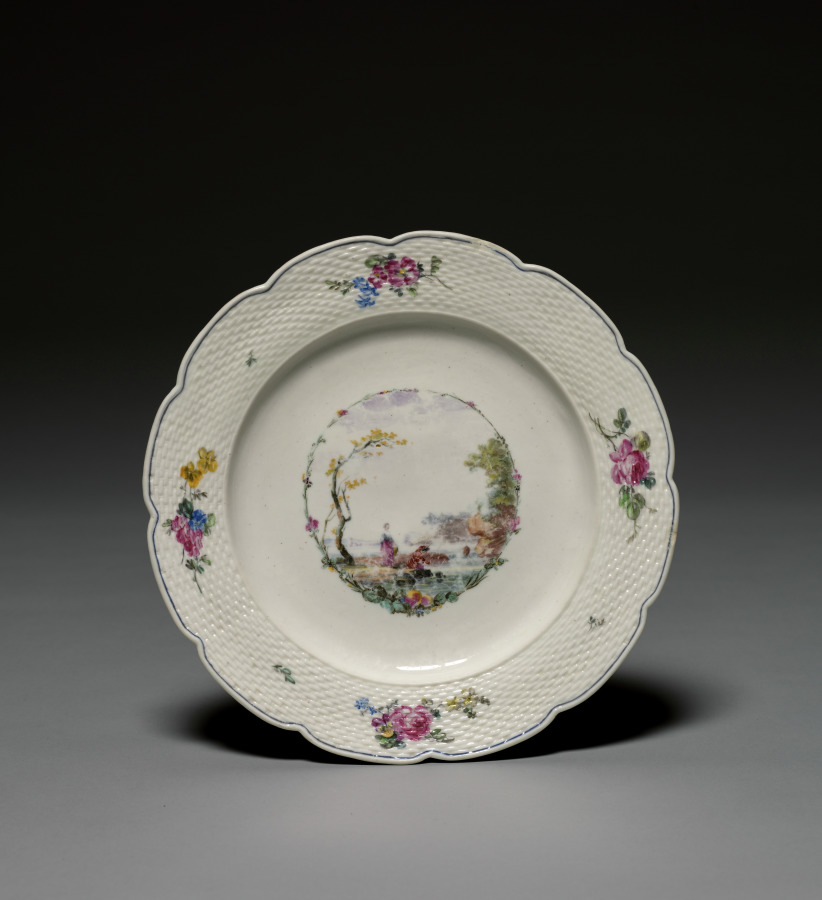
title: Plate (Assiette)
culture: France, Mennecy, 18th century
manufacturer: Mennecy Factory (French)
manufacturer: Mennecy- Villeroy Factory (French)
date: c. 1760–65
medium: soft-paste porcelain with enamel decoration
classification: Ceramic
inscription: [Incised]: "DV J"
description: As European porcelain production advanced, factories borrowed designs and techniques from one another in order to remain competitive in the porcelain market. Paintings of one to two figures perched on a rock or small hill overlooking a pastoral landscape were regularly reproduced on tea services fabricated at the Mennecy porcelain factory. These compositions were likely inspired by similar landscapes painted on porcelain at the Vincennes factory.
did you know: The hatched border of this plate was likely produced by engine-turning, a process by which clay is turned on a rotating tool to produce fluted, geometric, and diced patterns.